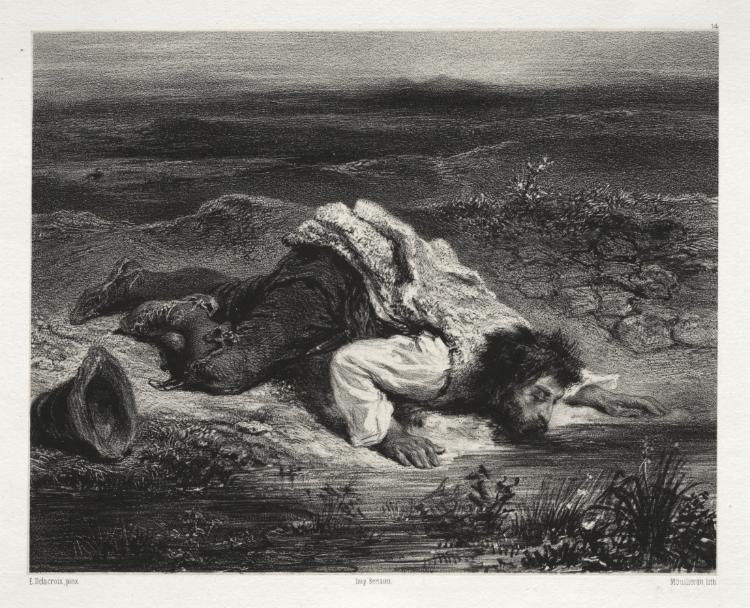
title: The Wounded Brigand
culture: France, 19th century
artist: Adolphe Mouilleron (French, 1820–1881)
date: 1849–62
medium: lithograph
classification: Print